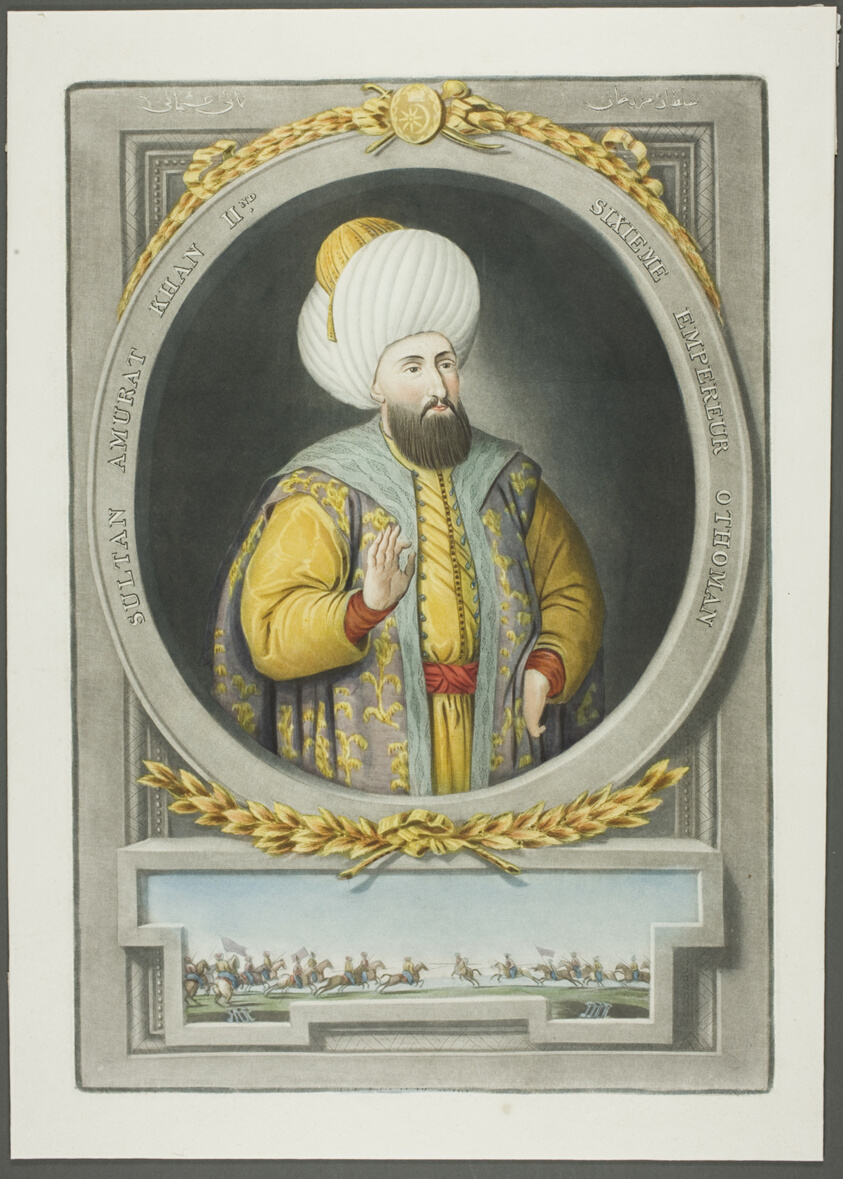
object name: Print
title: Amurat Kahn II, from Portraits of the Emperors of Turkey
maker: John Young (English, 1755-1825)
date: 1815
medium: Mezzotint, hand-colored with brush and watercolor, on ivory wove paper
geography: England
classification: mezzotint; print; prints and drawing